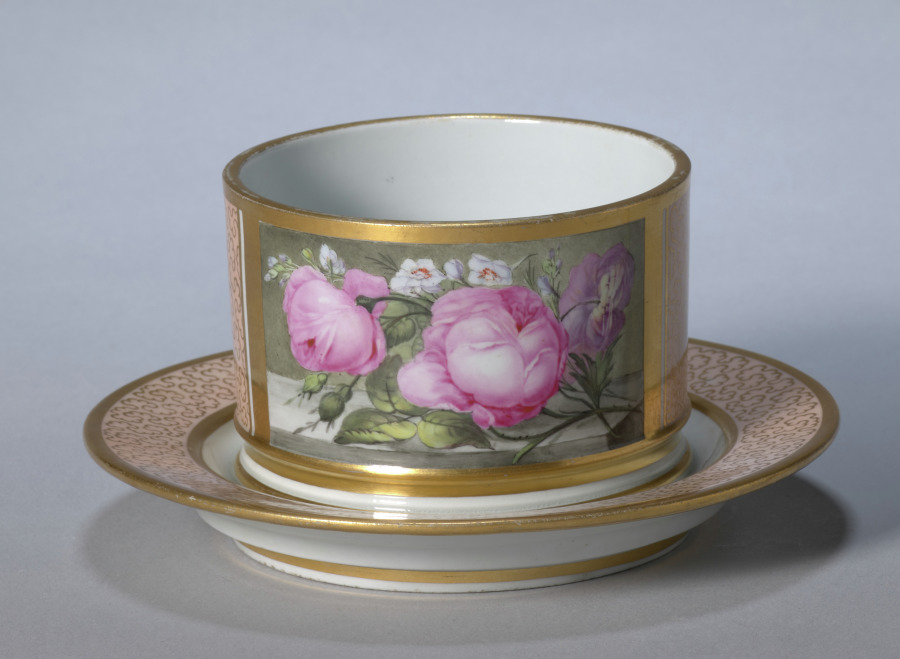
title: Dish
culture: England, Worcester, early 19th Century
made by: Worcester Porcelain Factory (British, established 1751)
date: c. 1810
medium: soft-paste porcelain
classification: Ceramic